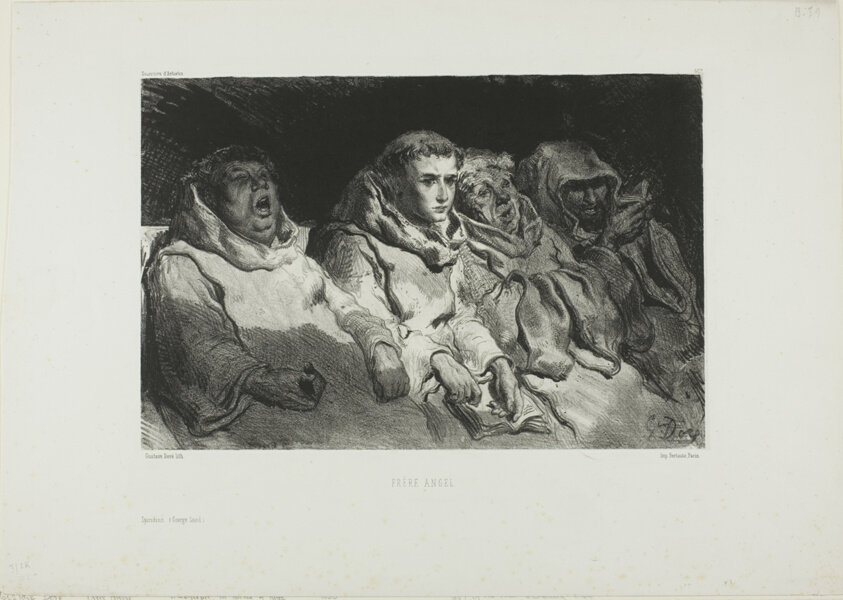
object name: Print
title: Brother Angel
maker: Gustave Doré (French, 1832-1883)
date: 1855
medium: Lithograph in black on off-white China paper, laid down on white wove paper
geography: France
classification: lithograph; print; prints and drawing